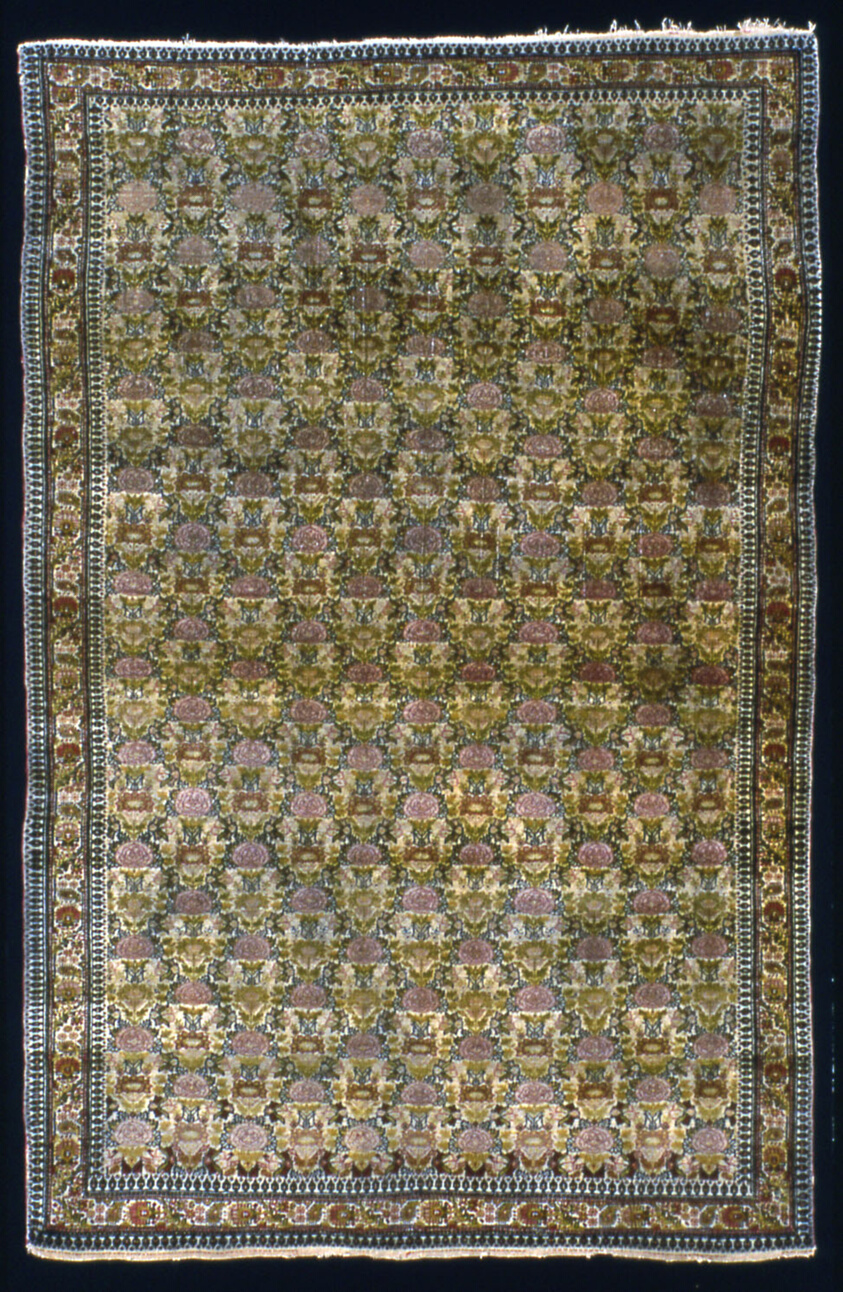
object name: Textile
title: Carpet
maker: Probably India or Persia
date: Late 19th century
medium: Cotton, plain weave with wool supplementary wrapping wefts forming cut pile through a technique known as "Sehna knots"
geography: India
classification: textile; weaving - rug